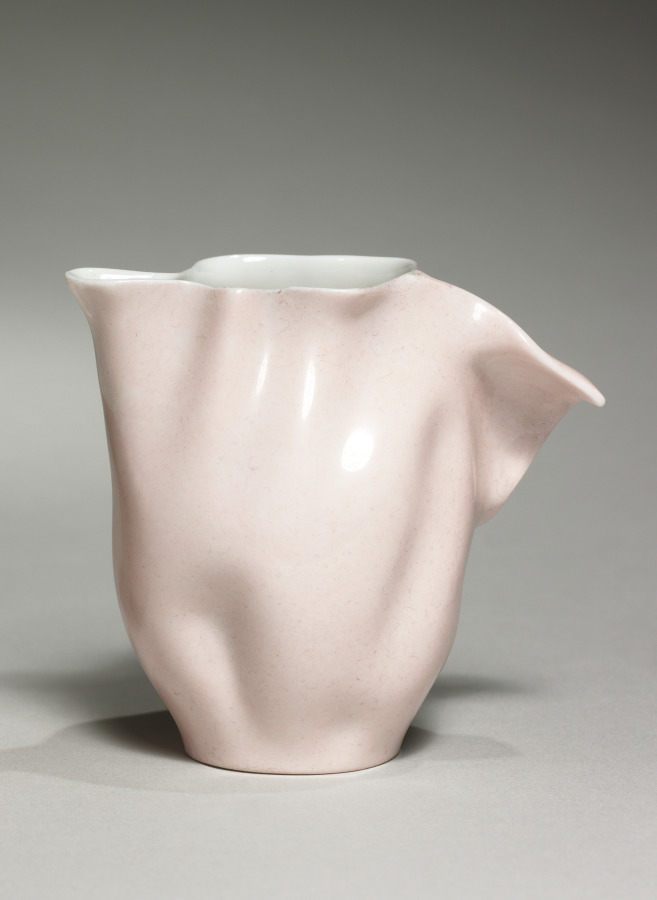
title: Service Aïda: Pitcher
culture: France, Limoges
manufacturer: Jean Pouyat Factory (French)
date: c. 1880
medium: porcelain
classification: Ceramic